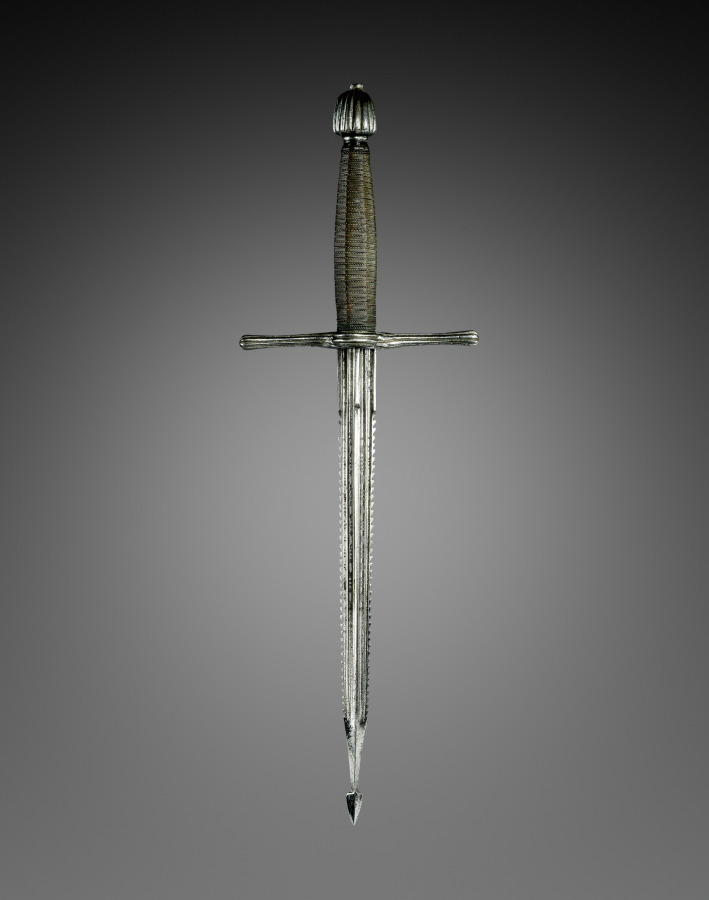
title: Parrying Dagger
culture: Italy, late 16th - early 17th Century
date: c. 1580–1610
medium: steel, copper wire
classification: Arms and Armor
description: The perforations within the blade were meant to provide elasticity, preventing it from snapping during vigorous parries. The serrations were arranged not for producing an unpleasant wound, but to "catch" the adversary's blade.